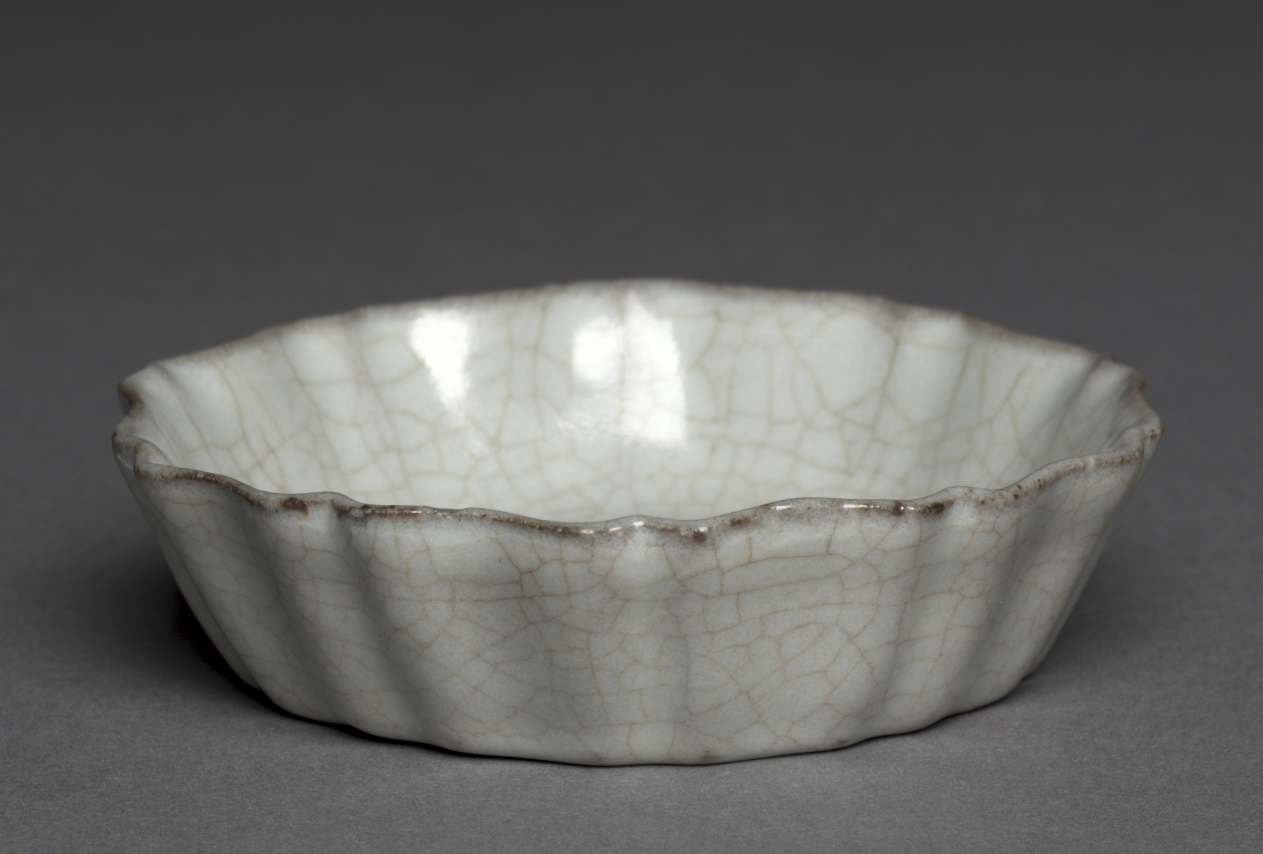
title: Brush Washer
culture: China, Southern Song dynasty (1127-1279)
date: 1200s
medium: porcelaneous stoneware, Guan ware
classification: Ceramic